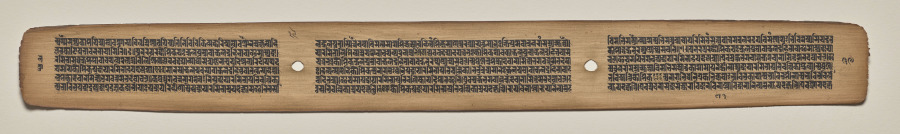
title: Text, Folio 39 (verso), from a Manuscript of the Perfection of Wisdom in Eight Thousand Lines (Ashtasahasrika Prajnaparamita-sutra)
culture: Eastern India, Bihar, Vikramashila Monastery. Painting: Nepal, Kathmandu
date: Sunday, September 14, 1119 (year 239 of the Newar Samvat in the month of Ashvina)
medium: gum tempera and ink on palm leaves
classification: Painting